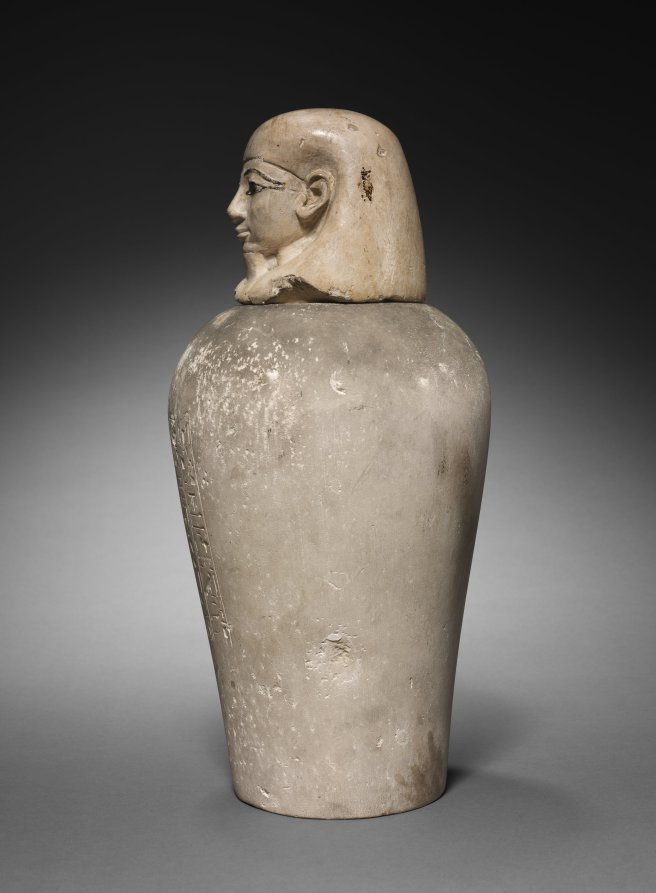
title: Canopic Jar with Lid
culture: Egypt, New Kingdom (1540–1069 BCE), Dynasty 18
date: 1540–1296 BCE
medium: limestone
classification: Funerary Equipment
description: Embellished tulle strips delicately wrap around the length of the Dior gown like linen covering a mummified body. As European artists in the 1800s who journeyed to Egypt drew what they saw, for the Dior collection he designed, John Galliano sketched his experiences in Egypt to develop this theatrical collection, merging additional inspirations of medical bandages and fetish fashion. In ancient Egypt, mummification was the most sacred practice performed. Rituals, such as removing organs and placing them in canopic jars, like the one here, and wrapping bodies and putting them in coffins, helped ensure the deceased’s safe passage into the afterlife.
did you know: Canopic jars are named after the Greek sailor Canopus, who was said to be buried at Canopus (Abuqir) in the western Nile delta and worshipped there in the form of a human-headed jar that was actually a form of Osiris and had nothing to do with internal organs. But the term has stuck.